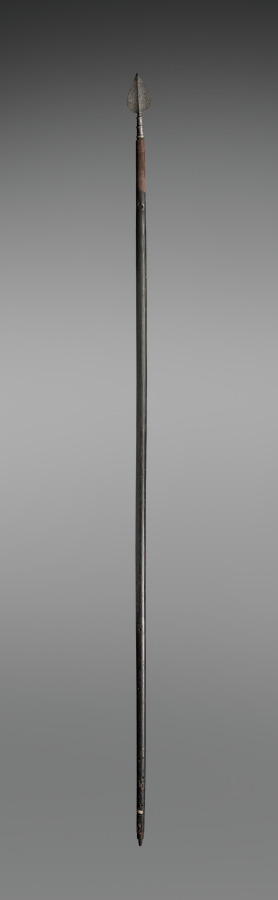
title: Banner with a Quartered Royal Arms of Spain and the Madonna and Child (pole)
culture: Spain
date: 1500s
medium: wood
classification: Arms and Armor